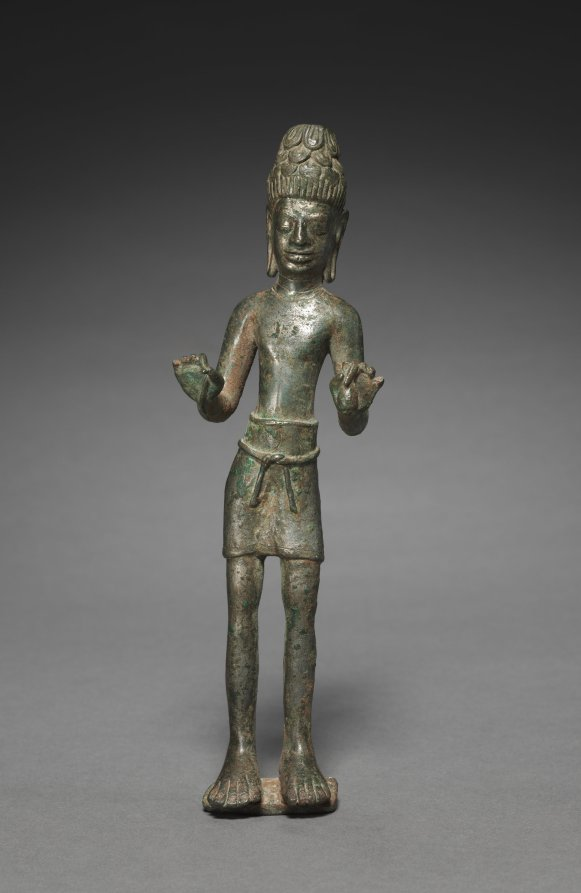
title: Bodhisattva Avalokiteshvara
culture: Northeastern Thailand, Khorat Plateau, Buriram Province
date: 600s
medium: bronze and silver alloy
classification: Sculpture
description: This rare image survives from the early phase of Buddhist sculpture in Southeast Asia. Made in what is known as the Pra Khon Chai style, it has the characteristic sensitivity of expression, slender physique, and looped locks of hair. This figure once held a lotus flower in the right hand and flask in the left—identifying features of Avalokiteshvara in this region.